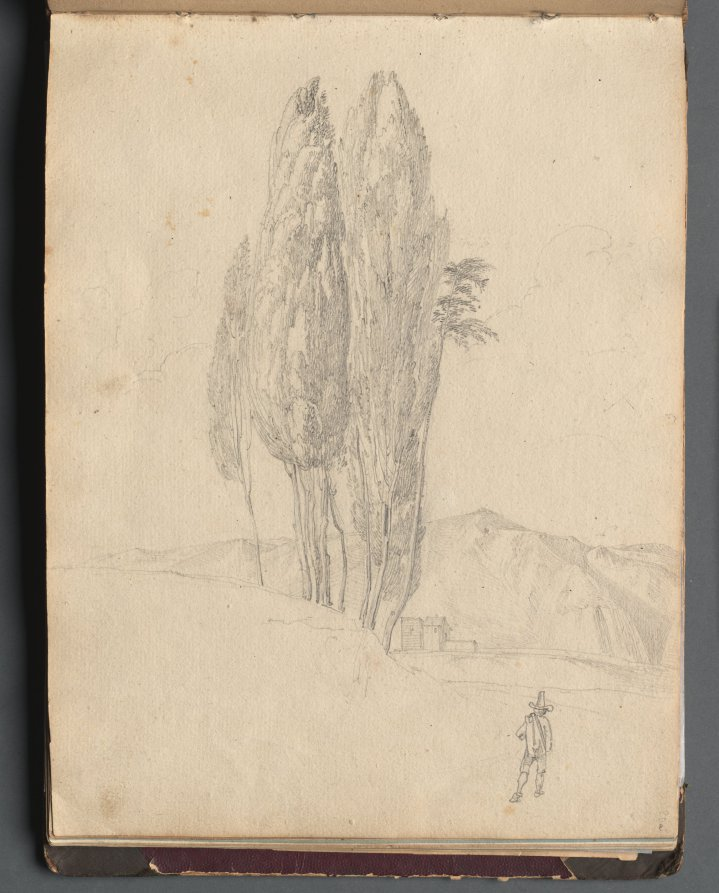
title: Album with Views of Rome and Surroundings, Landscape Studies, page 20a: Trees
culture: Germany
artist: Franz Johann Heinrich Nadorp (German, 1794–1876)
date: c. 1830s-70s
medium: graphite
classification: Bound Volume